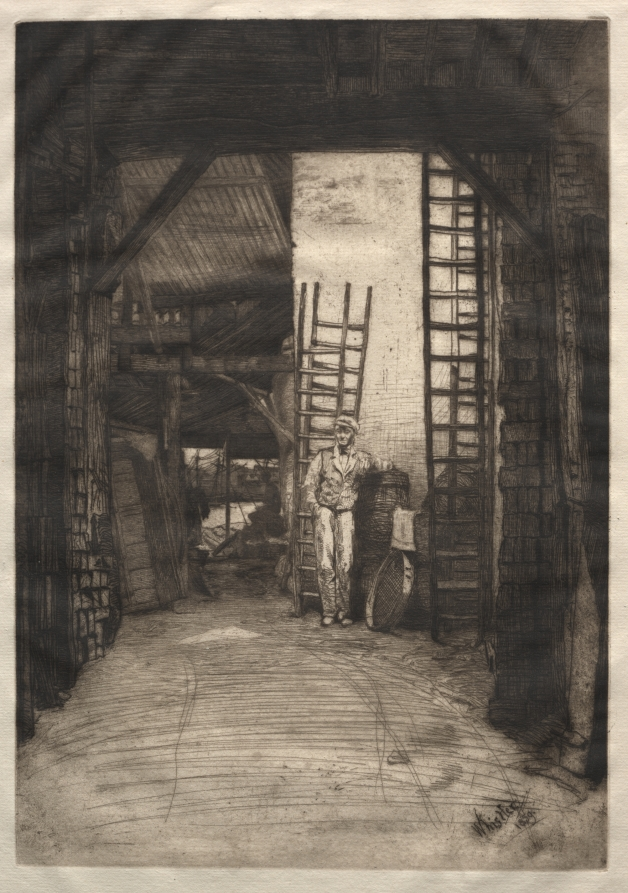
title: The Lime-burner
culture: America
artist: James McNeill Whistler (American, 1834–1903)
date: 1859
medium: etching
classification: Print